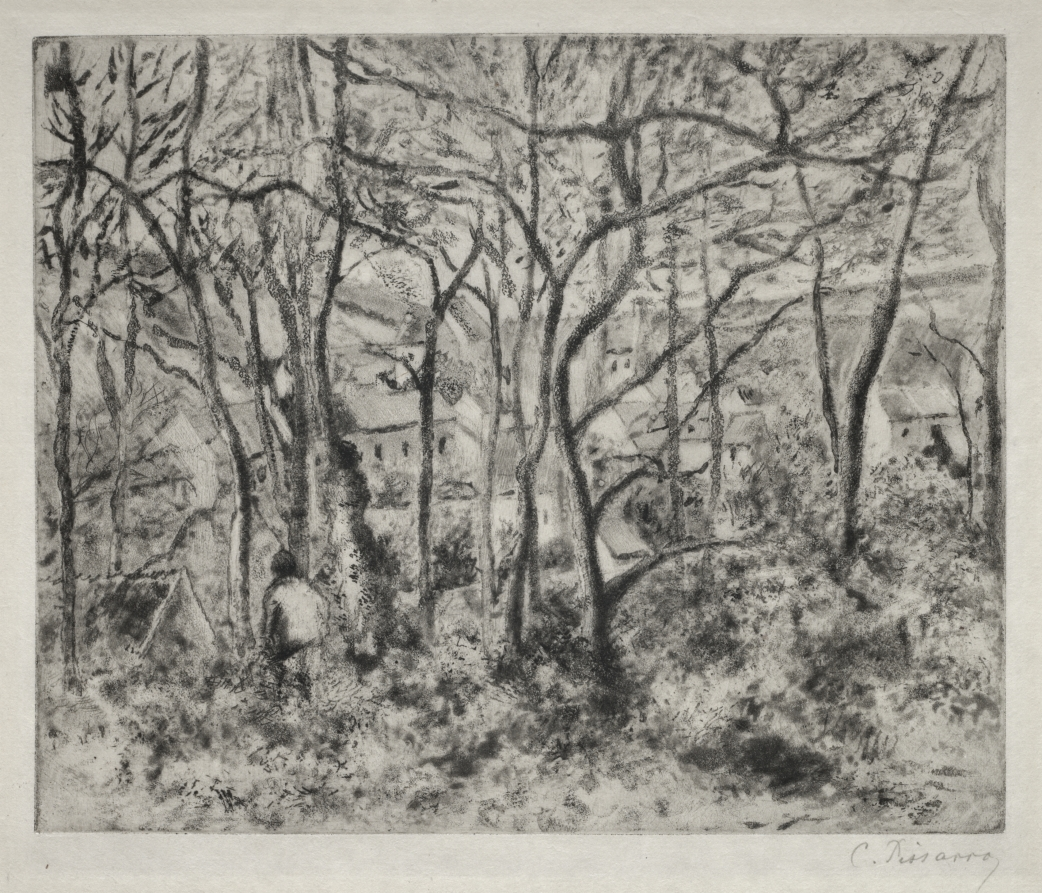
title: Wooded Landscape at L'Hermitage, Pontoise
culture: France, 19th century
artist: Camille Pissarro (French, 1830–1903)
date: 1879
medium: softground, aquatint, and drypoint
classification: Print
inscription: lower right, in graphite: C. Pissarro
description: Camille Pissarro depicted this view of Pontoise, the Parisian suburb where he lived at the time, using a range of etching techniques. He evoked the effects of natural light amid the shadowy forest by combining grainy aquatint with softground—a process that creates loose, painterly lines and tone. Although primarily known as painters, many of the Impressionists took up printmaking, developing new techniques to translate the effects of natural light. Pissarro, especially, experimented with etching, working extensively with the technique alongside Edgar Degas around the time this print was made.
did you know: Pissarro made this print for the journal Le Jour et la nuit that he planned with Edgar Degas, but was never realized.